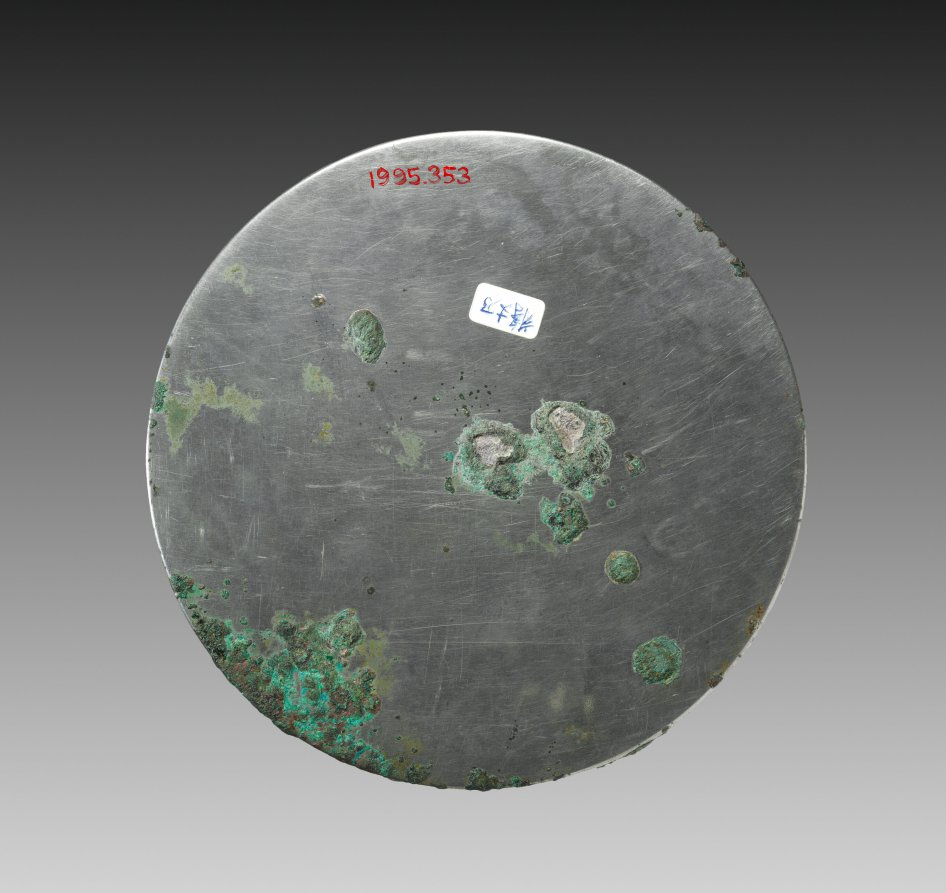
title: Animal-and-Grape Mirror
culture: China, Tang dynasty (618-907)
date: late 600s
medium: bronze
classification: Metalwork